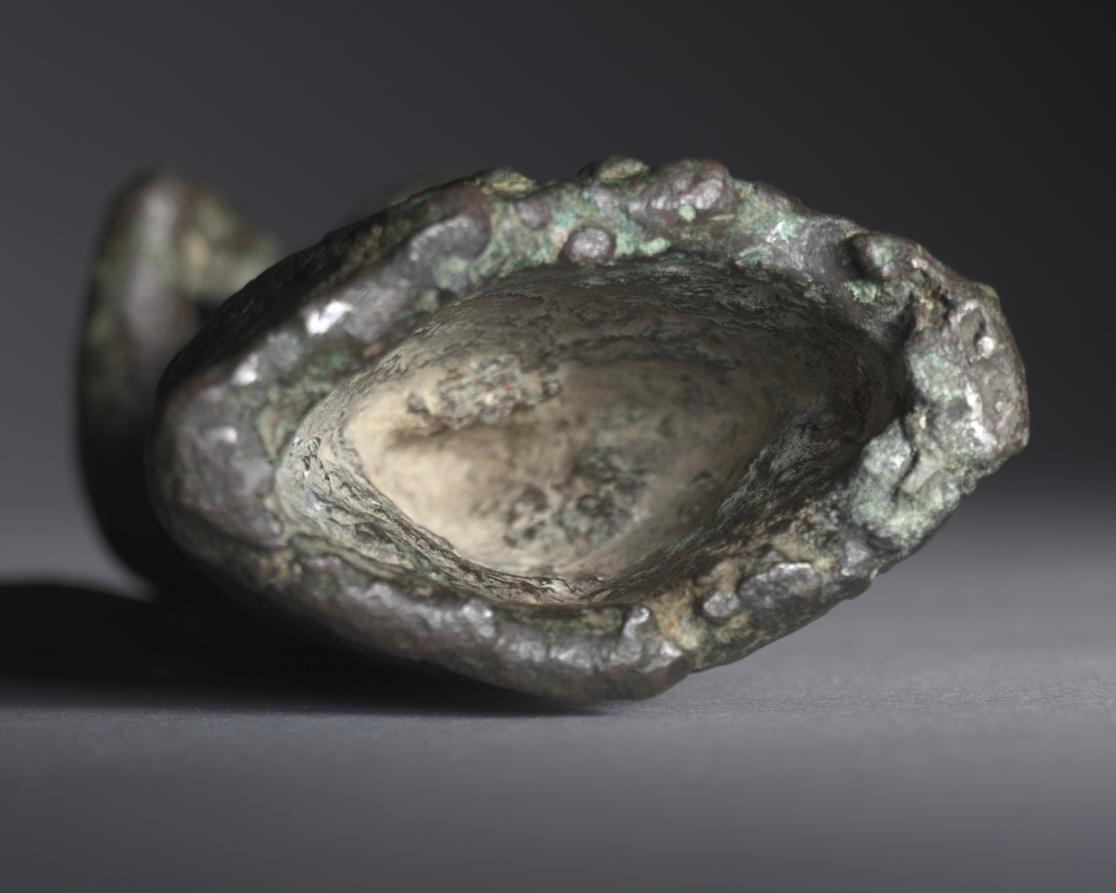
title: Female Worshiper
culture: Crete, Minoan, middle Minoan III–late Minoan I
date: c. 1600–1500 BCE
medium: bronze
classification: Sculpture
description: This extremely rare Minoan bronze statuette represents a girl worshiping a deity. It was probably left as a dedication to a divinity. She wears a flounced skirt over a sleeved robe open at the front. The figure shows a remarkable degree of detail, including looped earrings, bracelets, and a necklace. Her shaved hairstyle, not found on any other Minoan bronze statuette, matches that of painted figures in roughly contemporary frescoes uncovered on the island of Thera, north of Crete. Its excellent condition, rarity, fine detail, and balanced proportions set it apart from other statuettes of its type to have survived.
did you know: The shaved head with prominent locks of hair indicates that this female votive figure is an adolescent.